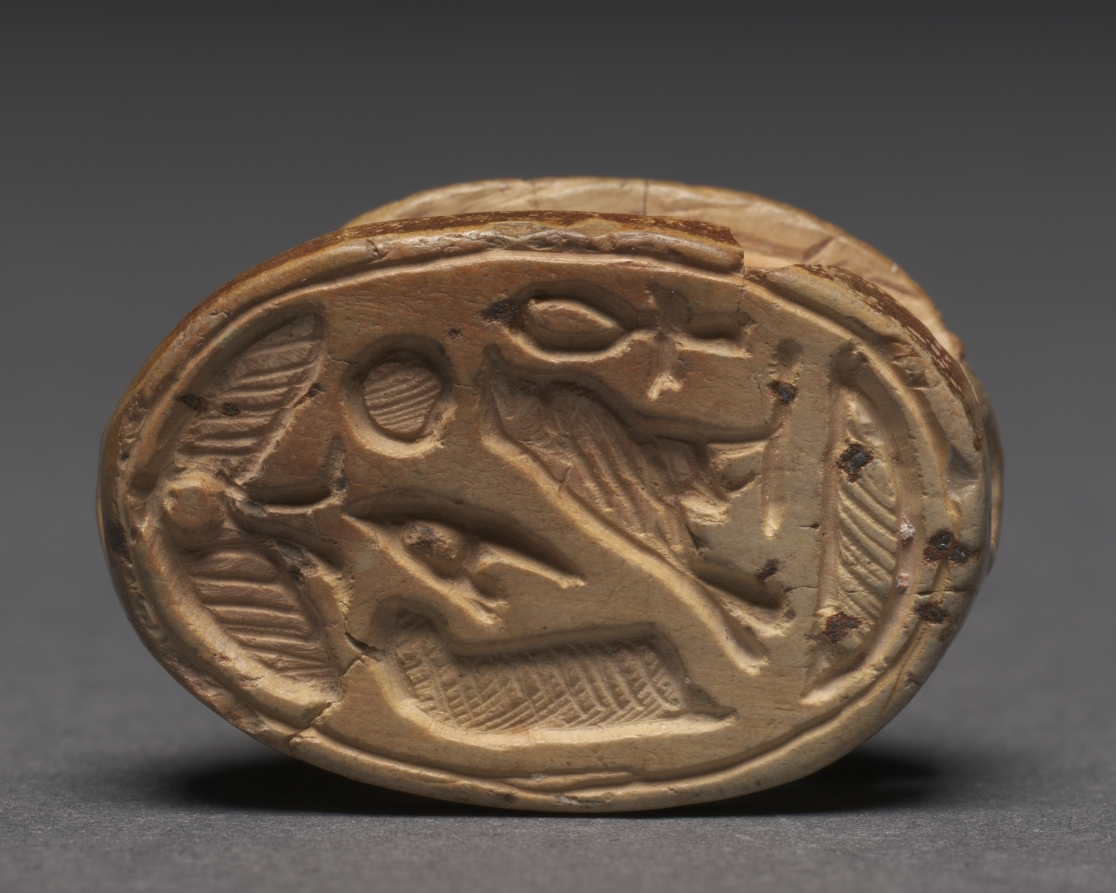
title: Hedgehog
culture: Egypt, New Kingdom (1540–1069 BCE), Dynasty 18, reign of Amenhotep III (1390–1352 BCE)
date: c. 1391–1353 BCE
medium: steatite, originally glazed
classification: Scarabs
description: This hedgehog (Paraechinus aethiopicus) stands in the round on an oval base, with openwork defining the legs. The carving is delicate and spirited. The face features large, round eyes; widely spaced, short ears; bulging cheeks; and a protruding snout. A tiny tail hangs at the rear. Crosshatching on the back represents the animal's spines. The design on the base begins at the head with a winged sun disk with pendant uraei. Below is a cluster of hieroglyphic signs, including an ankh-sign, a falcon with a sun disk, a hoe, and a maat-feather. A neb-sign fills the balance below. The significance of the hedgehog has multiple theories. As a hibernating animal, it may have associated with the powers of self-renewal and resurrection. Another lies in the animal's defensive strategy of inflating itself into a ball and projecting its spines, a posture of obvious apotropaic significance. Lastly, Egyptian folklore maintained that hedgehog amulets provided protection against snake bites, a belief grounded in the animal's natural resistance to poison.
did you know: Hedgehogs were common on amulets in the New Kingdom (1500s–1000s BC) and can also be seen on the backs of seals and scaraboids.